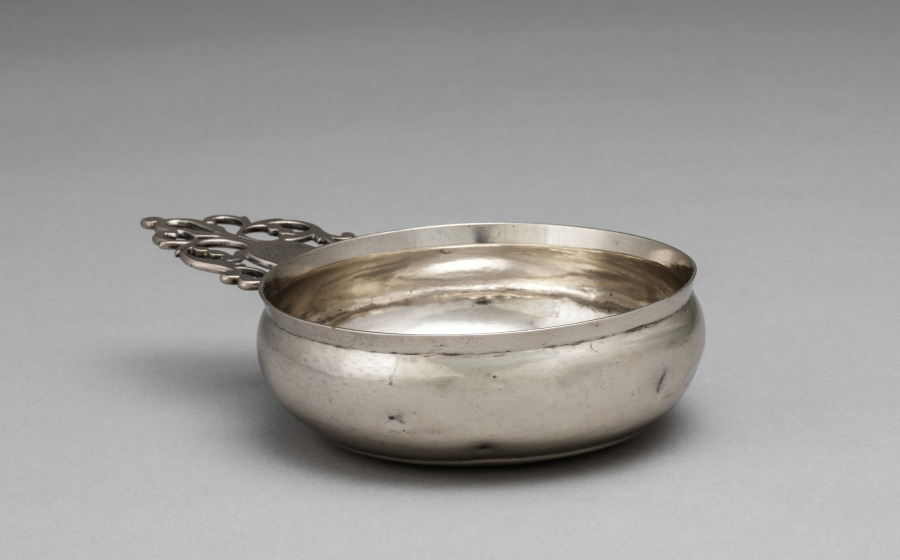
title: Porringer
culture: America, Massachusetts, Boston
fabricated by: Benjamin Burt (American, 1729–1805)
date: c. 1750–1800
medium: silver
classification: Silver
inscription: engraved "W" over "C=M" in block letters below mark on top of handle.